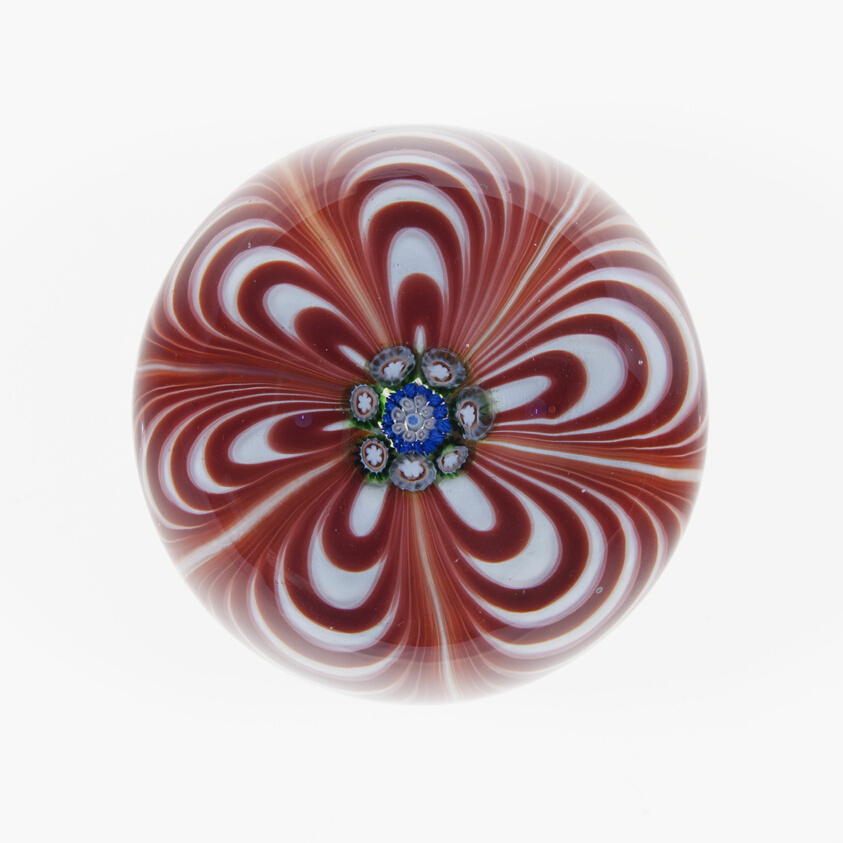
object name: Glass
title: Paperweight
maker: Saint-Louis Glassworks (Cristalleries de Saint-Louis); Lorraine, France, founded 1586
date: c. 1845/60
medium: Glass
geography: Saint-Louis-lès-Bitche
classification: paperweight; glass